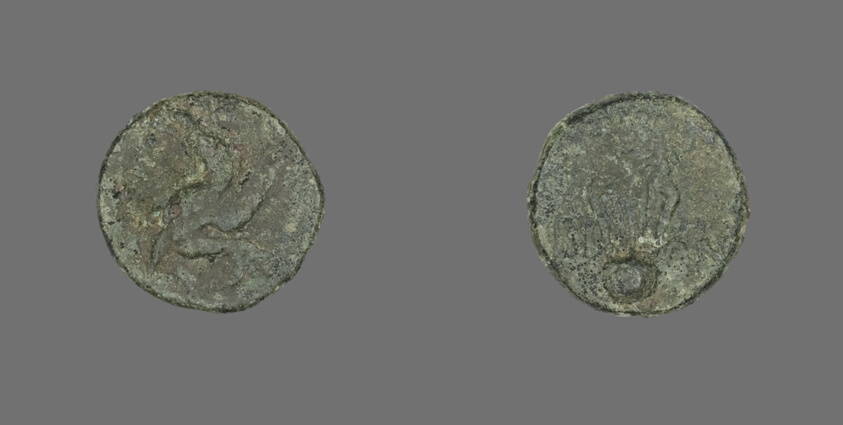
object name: Coin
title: Coin Depicting a Griffin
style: greek, ancient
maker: Greek; Teos, Ionia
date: 4th-1st century BCE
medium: Bronze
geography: Roman Empire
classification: coin; ancient art